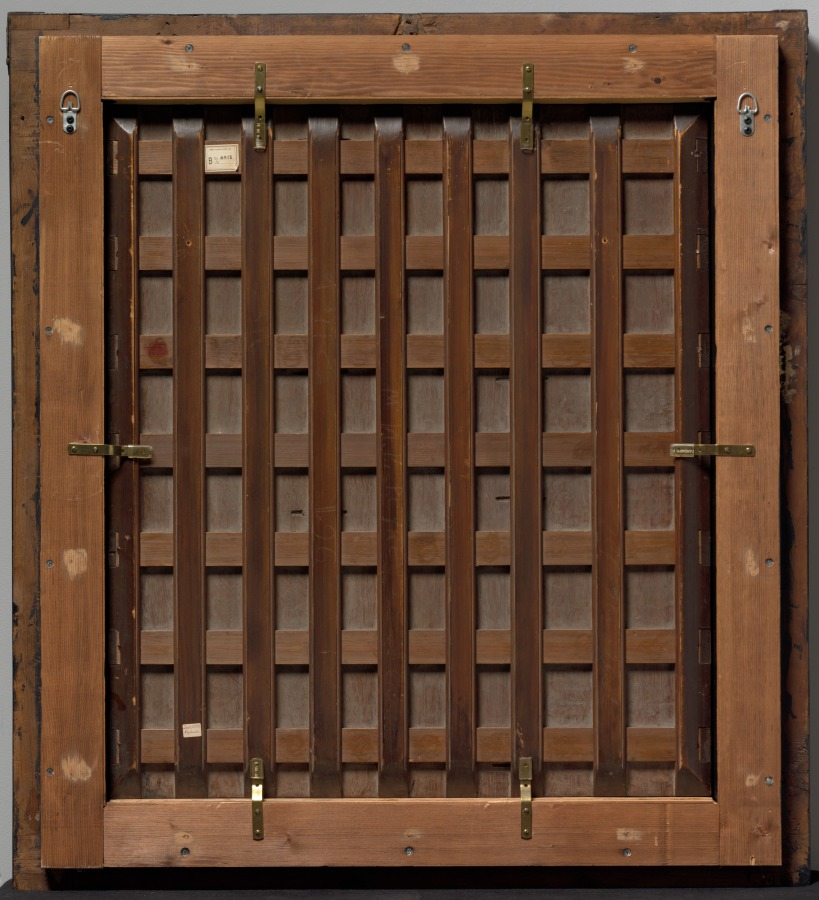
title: Portrait of Machtelt Suijs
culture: Flanders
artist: Maerten van Heemskerck (Dutch, 1498–1574)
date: c. 1540–45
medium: oil on wood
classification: Painting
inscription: note on cradle appears on a notation in chalk (originally) slightly scratched faintly letters " Mr A.M.C [?] or K [?] Reyve"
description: Maerten van Heemskerck lived in Rome for four years (1532–36) and was deeply affected by the city's art and antiquities. Here, the half-length, seated figure, the tense yet elegant hands, and even the grotesque classical mask reflect the impact of that experience, while the love of meticulously represented textures is traditionally associated with northern European art. Machtelt Suijs married Dirick van Teijlingen in 1535 and lived in Alkmaar (the Netherlands), where Heemskerck must have painted her. The coat-of-arms that hangs from the mask combines family emblems, indicating that her portrait must have been accompanied by one (now lost) of her husband.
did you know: The coat of arms depicts golden pile drivers, indicating the family construction business.